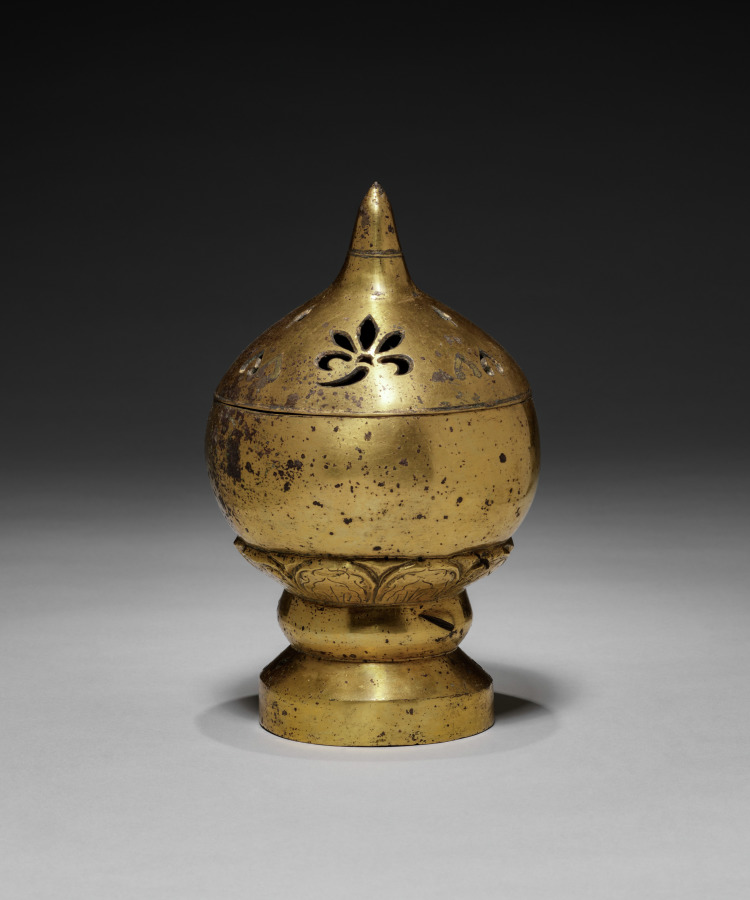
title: Censer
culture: China, Tang dynasty (618–907)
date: early 600s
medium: gilt bronze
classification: Metalwork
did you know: The censor's base has a band of incised lotus-petal motifs, while the pointed lid has openwork floral motifs to release the incense's aroma.